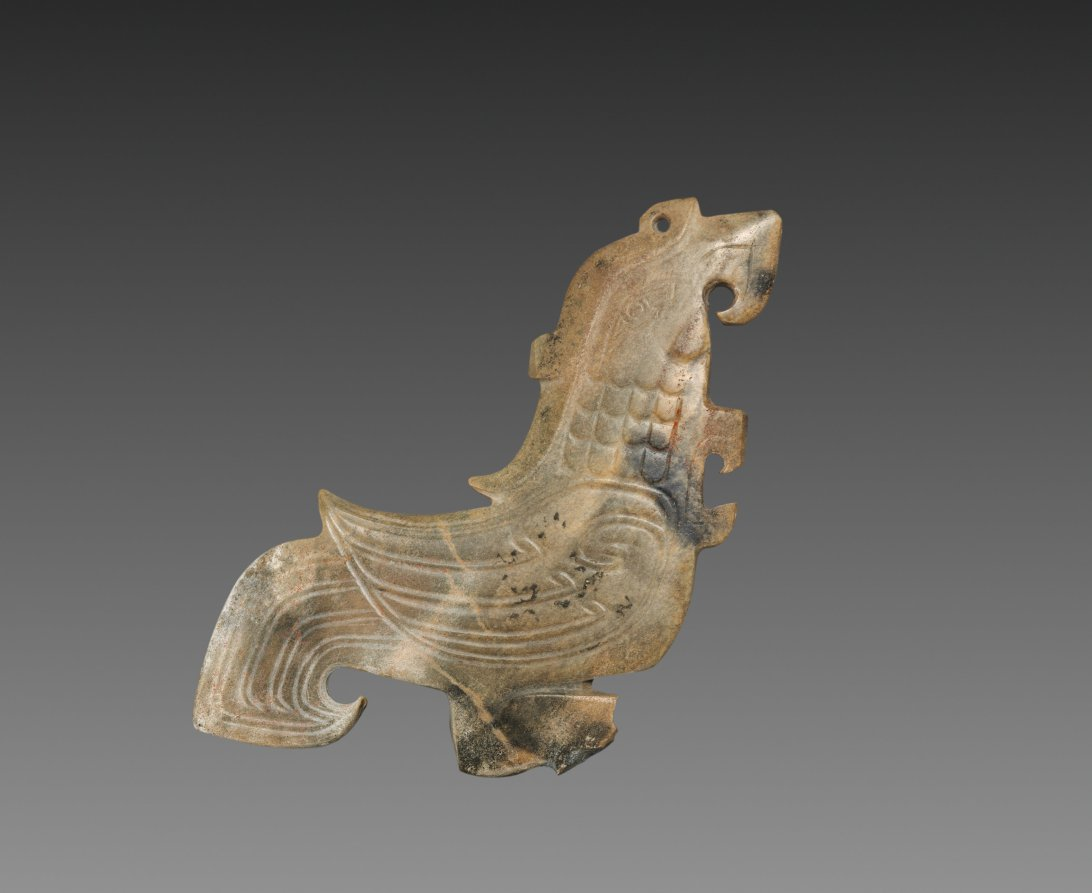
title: Jade Bird Pendant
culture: China, Western Zhou dynasty (c. 1046–771 BCE)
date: c. 1000–mid 900s BCE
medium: nephrite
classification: Jade